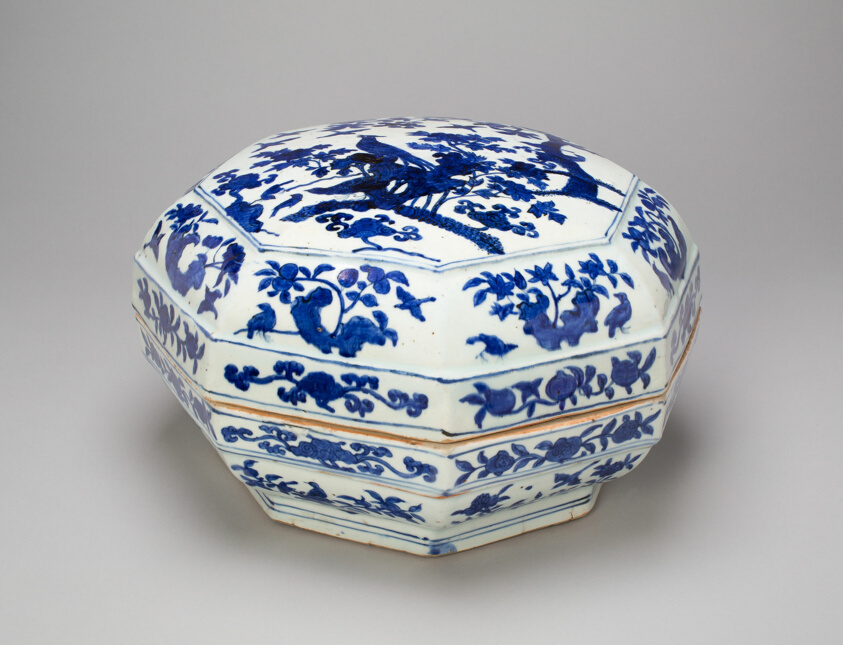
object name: Vessel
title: Octagonal Box with Birds, Peony Flowers, and Peach Branches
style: Chinese (culture or style)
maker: China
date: Ming dynasty (1368–1644), Jiajing reign mark and period (1522–1566)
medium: Porcelain painted in underglaze blue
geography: China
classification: porcelain; asian art; ceramics; vessel